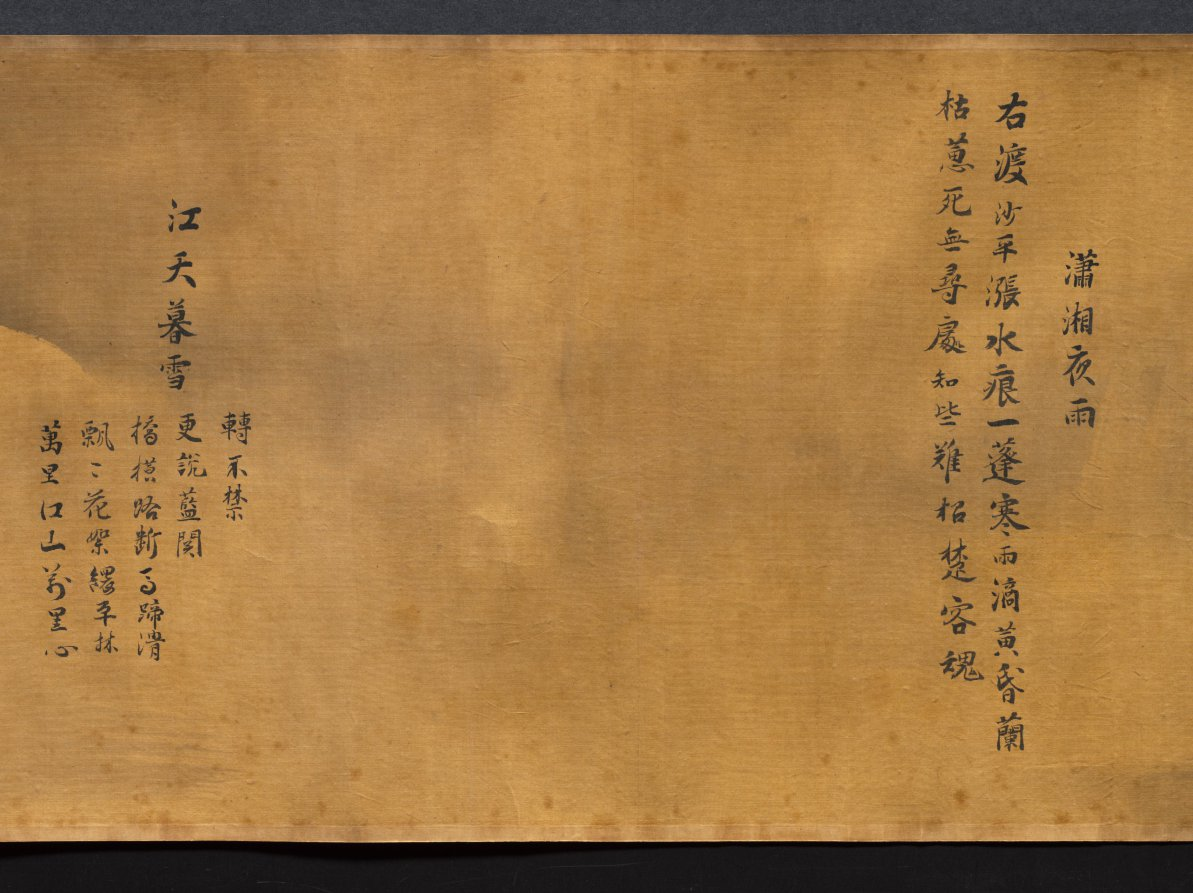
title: Eight Views of Xiao-Xiang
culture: Japan, Edo period (1615–1868)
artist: Kano Tan’yū (Japanese, 1602–1674)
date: 1615–1868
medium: handscroll; ink on silk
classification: Painting